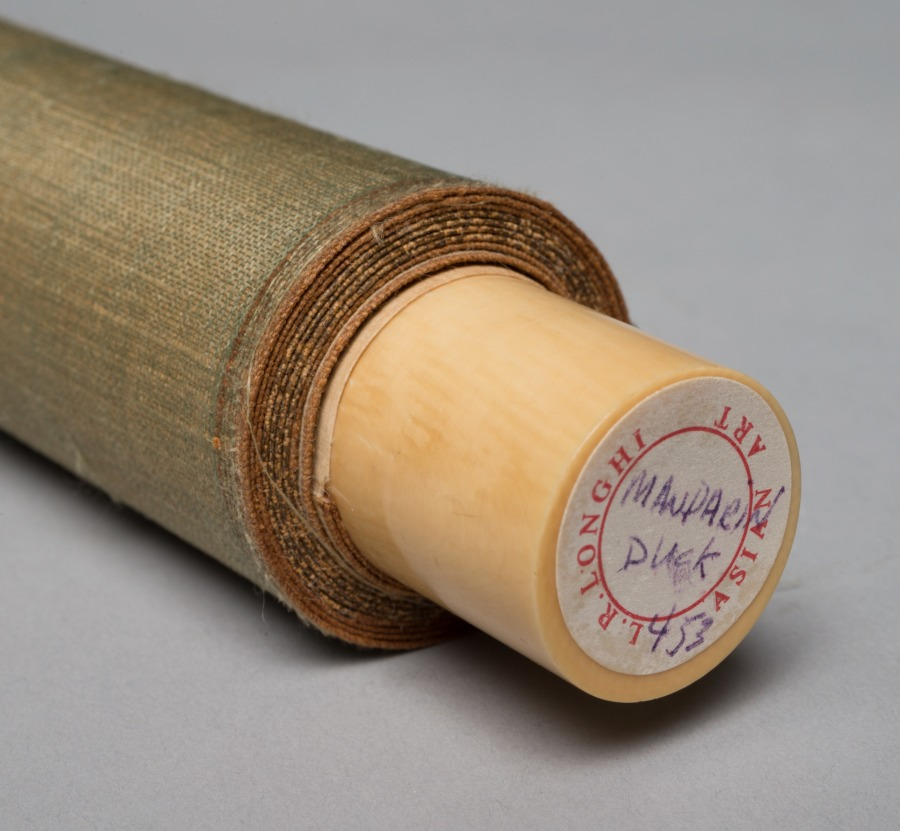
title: Duck in Flight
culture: Japan, Muromachi period (1392–1573)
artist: Shikibu Terutada (Japanese, active mid-1500s)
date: mid-1500s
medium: fan painting mounted as hanging scroll; ink and gold on paper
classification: Painting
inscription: artist's seal in lower right.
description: These three fan-shaped paintings, now mounted as individual hanging scrolls, were once part of a set of 20 mounted on a folding screen. They portray the Chinese subjects, from left to right, of the scholar-official Pan Lang, Hanshan reciting his poetry to Shide, and a duck in flight above reeds. Pan Lang grew so fond of the mountain in his place of exile that when he was ordered back to the capital, he rode backward on his donkey so he could see it until it receded into the distance. Hanshan and Shide worked in the kitchen of a Zen monastery, but were actually reincarnations of the bodhisattvas Manjushri and Samantabhadra. The combination of a mandarin duck and reeds may have signified a level of attainment in Chinese civil service exams. All three paintings bear the seal of the Kantobased artist Shikibu Terutada. Shikibu was familiar with Kano school painting, but he also modeled his early style after that of the prominent Kanto-based Kenkō Shōkei (active about 1470–after 1523).